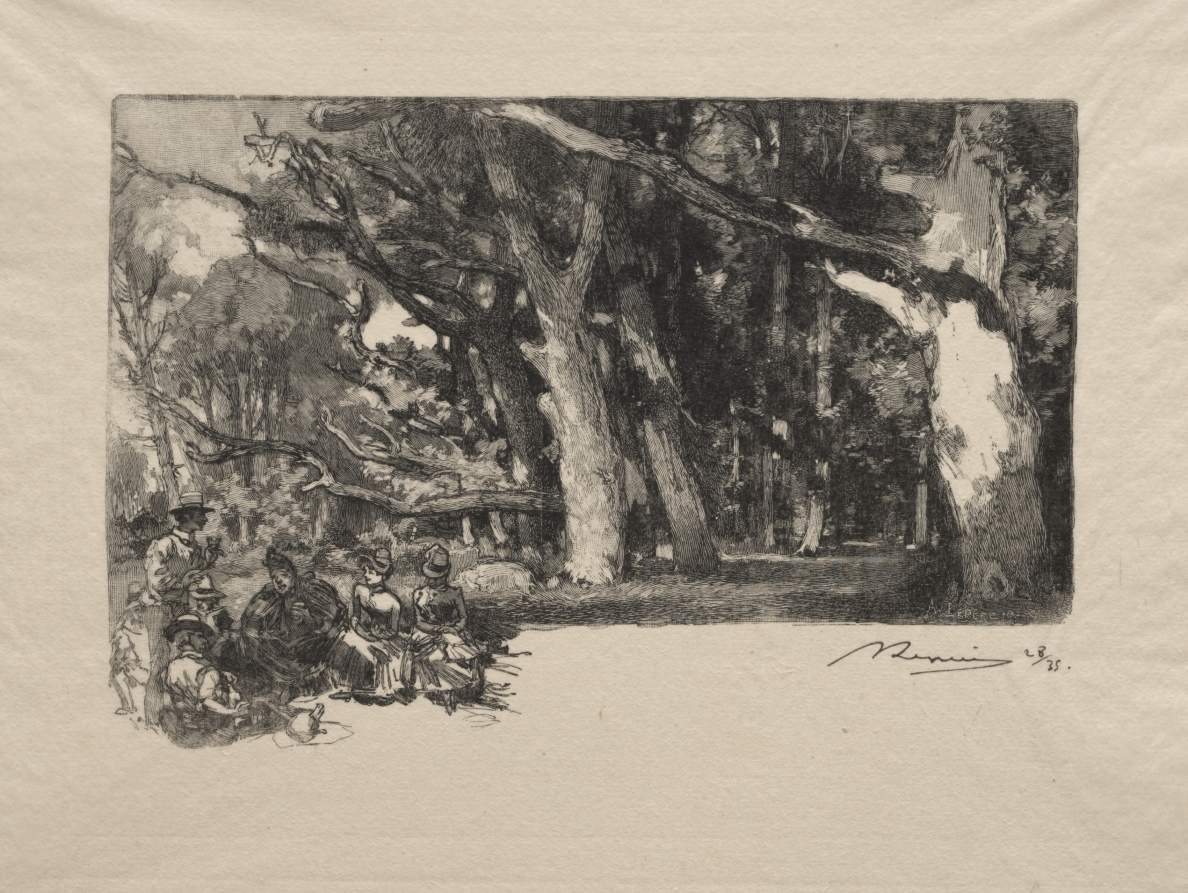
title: Midi sous bois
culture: France, 19th-20th century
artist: Auguste Louis Lepère (French, 1849–1918)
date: 1889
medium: wood engraving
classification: Print